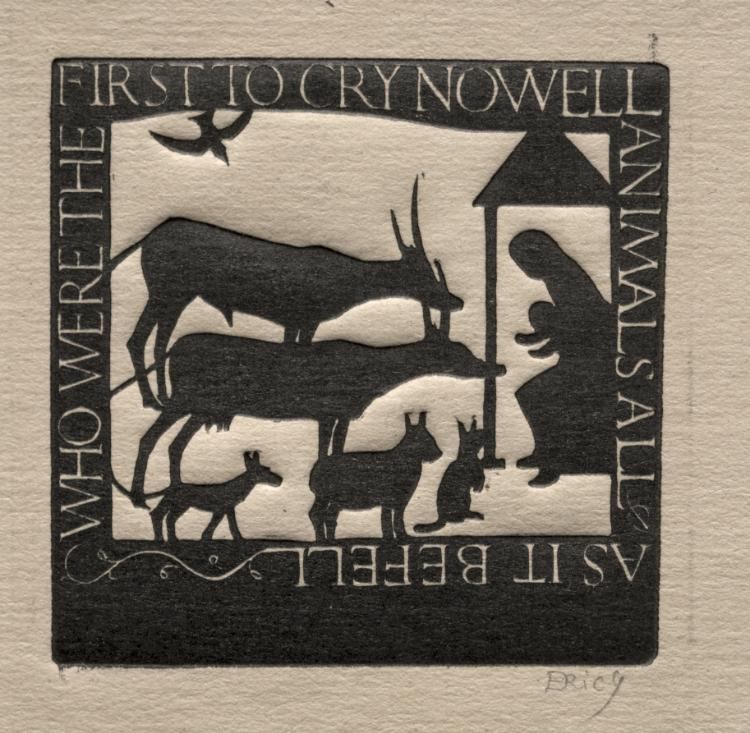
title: Animals All: Who Were the First to Cry Nowell?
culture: England, 20th century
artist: Eric Gill (British, 1882–1940)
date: 1916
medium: wood engraving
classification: Print